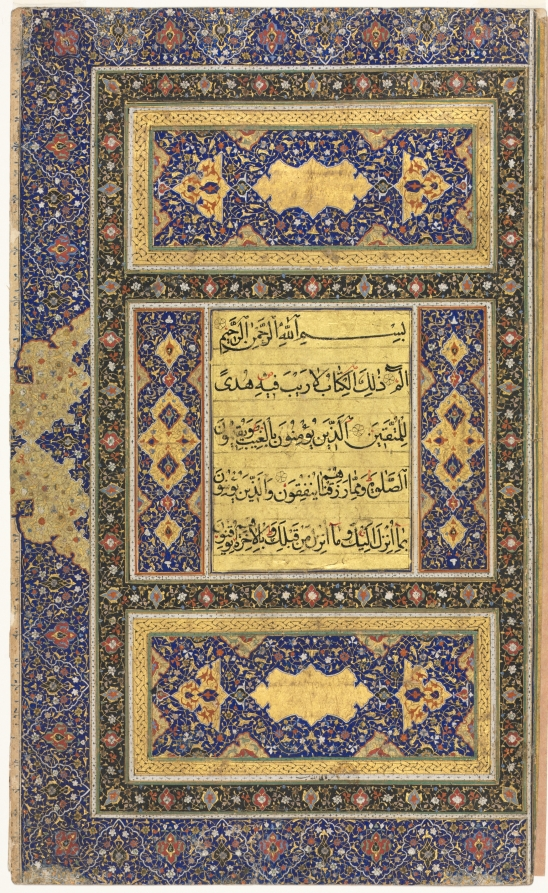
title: Qur'an Manuscript Folio (Recto); Left Folio of Double-Page Illuminated Frontispiece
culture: Afghanistan, Herat, Safavid period (1501–1722)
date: 1500s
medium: ink, gold, and colors on paper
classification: Manuscript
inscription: Translation: Surah I: 1-7: In the Name of God, the Merciful, the Compassionate. Praise belongs to God, the Lord of all Being, the All merciful, the All-compassionate, the Master of the Day of Doom Thee only do we serve; to Thee alone do we pray for succour. Guide us in the straight path, the path of those whom Thou has blessed, not of those against whom Thou art wrathful, nor of those who are astray. Left folio (Surah II, 1-4) In the Name of God, the Merciful, the Compassionate. Alif Lam Mim That is the book, wherein is no doubt, a guidance to the godfearing who believe in the Unseen, and perform the prayer, and expend of that We have provided them; who believe in what has been sent down to thee and that had been sent down before thee, and have faith in the Hereafter; those are upon guidance from their Lord, those are the ones who prosper. Sura-al-Baqara [Chapter:The Cow] 2:1-4 (Arabic) Script: Naskhi (five lines to a page) Written in a very tiny hand, in the center of the white border that surrounds the lower rectangle, is the signature of the illuminator. The inscription is damaged, so that the name is illegible. Ir reads: amala [illegible] al-muzahib (the work of [illegible] the illuminator).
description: The Qur'an is the sacred book of Islam. In the view of orthodox Muslims, it is the literal word of God as revealed to the Prophet Muhammad (d. 632) in the Arabic language, and thus, recorded in the Arabic script. Because of its association with the divine word, Arabic calligraphy came to be a supreme art form in the Islamic world. As the quintessential symbol of the culture, it became a pervasive decorative element in Islamic art and architecture. Although secondary to calligraphy, a tradition of illumination—that is, ornamentation with colors and gold—developed to enhance the pages of the Qur'an. Because of the prestige associated with the book arts in the Islamic world, the decorative motifs employed by illuminators (scrolling vines, blossoms, lozenges, and cartouches) found their way into other art forms, for example, metalwork, textiles, and carpets.